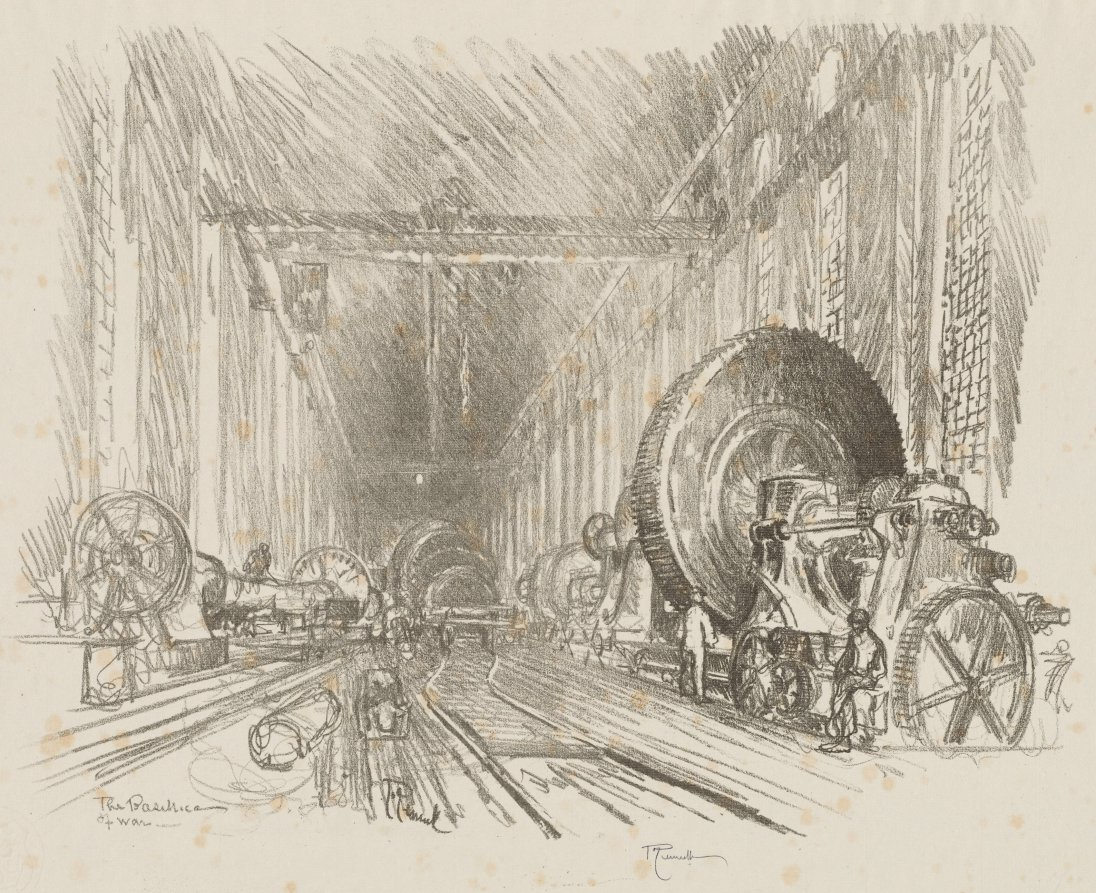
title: English War Work: The Basilica of War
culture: America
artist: Joseph Pennell (American, 1857–1926)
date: 1916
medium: lithograph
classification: Print